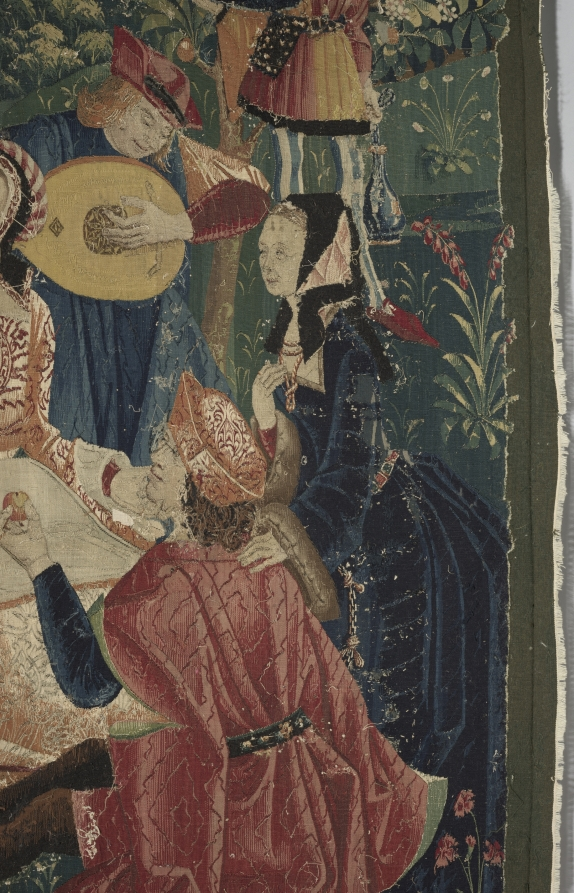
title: Time (from Chateau de Chaumont set)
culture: France, Lyon(?), early 16th century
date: 1512–15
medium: silk and wool; tapestry weave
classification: Tapestry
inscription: French verse in Gothic letters translates as follows: "One sees the weather adorned in green, Sometimes as pleasing as an angel; To suddenly change and be quite strange, The weather never stays the same."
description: Pierre Sala, who likely commissioned the set, is portrayed as the richly attired central figure offering a bouquet, a symbol of knowledge, to Éléonore, his daughter. Éléonore is pregnant, revealed by her upturned skirt and the persimmon in her husband Hector’s hand. Hector’s mother, Marguerite, in dark attire, will wed the widowed Sala in 1519. They appear in front of the royal chateau of Blois. The figures at the right convey Sala’s advice to his children. Time (the old man with the staff) with Clio, the Muse of History, standing on his shoulders, is being attacked by a Herculean youth wielding a stick. With this allegory, Sala is explaining that youth is ignorant of the complexities of life and time. The small unicorn at the far right represents the soul. The verse in Old French at the top refers to changing time: One sees Time adorned with green foliage, Sometimes as pleasant as an angel, Then suddenly change and become quite strange. Never does Time persist in one state.